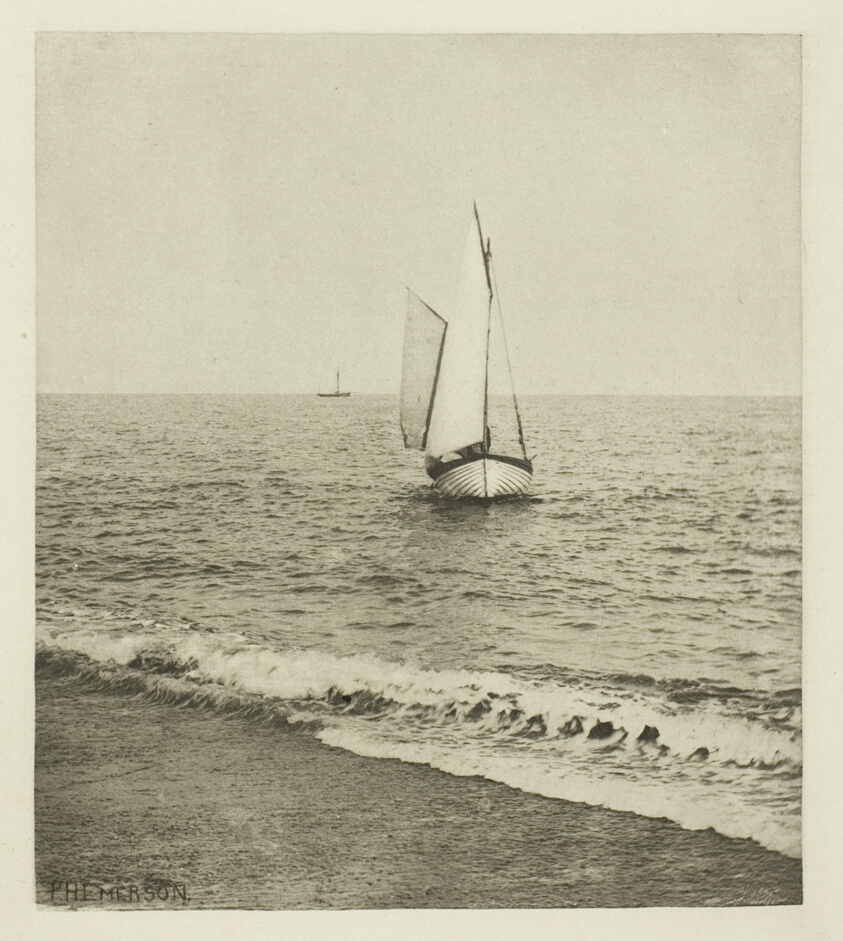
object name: Photograph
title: A Suffolk Shrimper "Coming Ashore"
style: 19th century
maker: Peter Henry Emerson (English, born Cuba, 1856–1936)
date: c. 1883/87, printed 1888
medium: Photogravure, pl. XXVI from the album "Pictures of East Anglian Life" (1888)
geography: England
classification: photogravure; photomechanical process; photography; photograph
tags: Collected by Hugh Edwards, Pictures of East Anglian Life, Seat of War in the Crimea